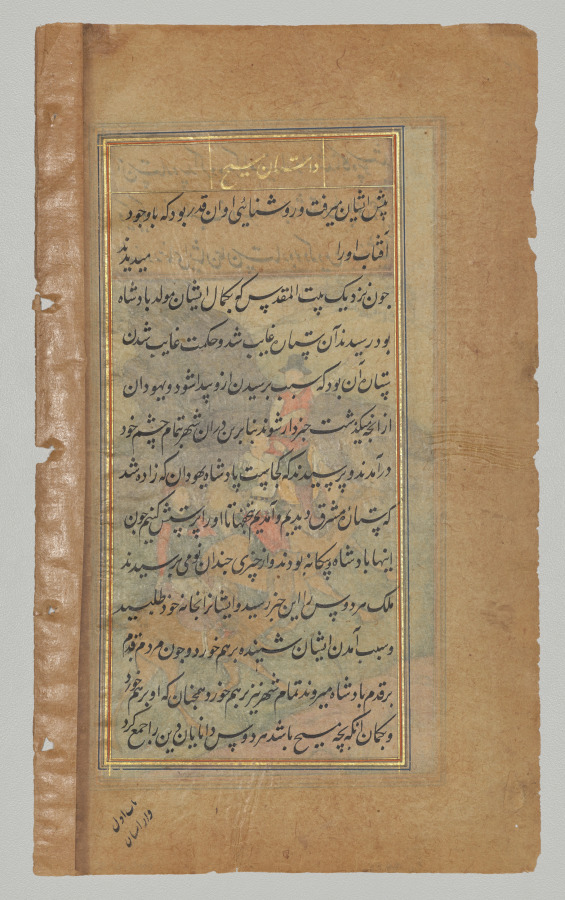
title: Text page from a Mirror of Holiness (Mir’at al-quds) of Father Jerome Xavier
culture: Mughal India, Allahabad, made for Prince Salim (1569–1627)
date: 1602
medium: Ink and gold on paper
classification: Manuscript